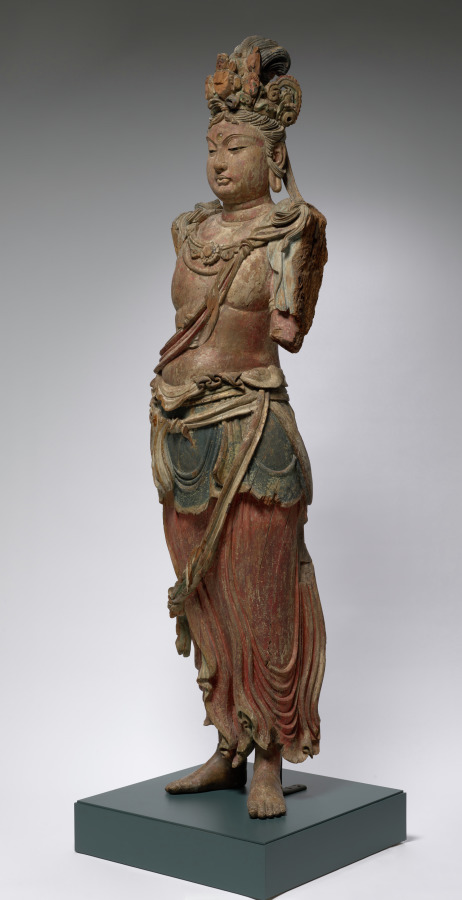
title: Eleven-Headed Guanyin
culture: China, late Northern Song dynasty (960-1127) - Jin dynasty (1115-1234)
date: 1100–1200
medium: wood with polychromy and cut gold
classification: Sculpture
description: The bodhisattva is an enlightened being dedicated to the spiritual awakening of all beings. The compassionate bodhisattva Guanyin, in a variety of manifestations, is probably the most popular deity of worship in Chinese Buddhism. In the Esoteric Buddhist form shown here, this standing Guanyin has a total of eleven heads, with smaller ones above the principal head. The uppermost head represents the Buddha Amitabha, to whom he is closely related. The eleven heads symbolize the Buddha’s steps on the path to enlightenment.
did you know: This Guanyin is carved from a single block of willow (genus Salix sp.).